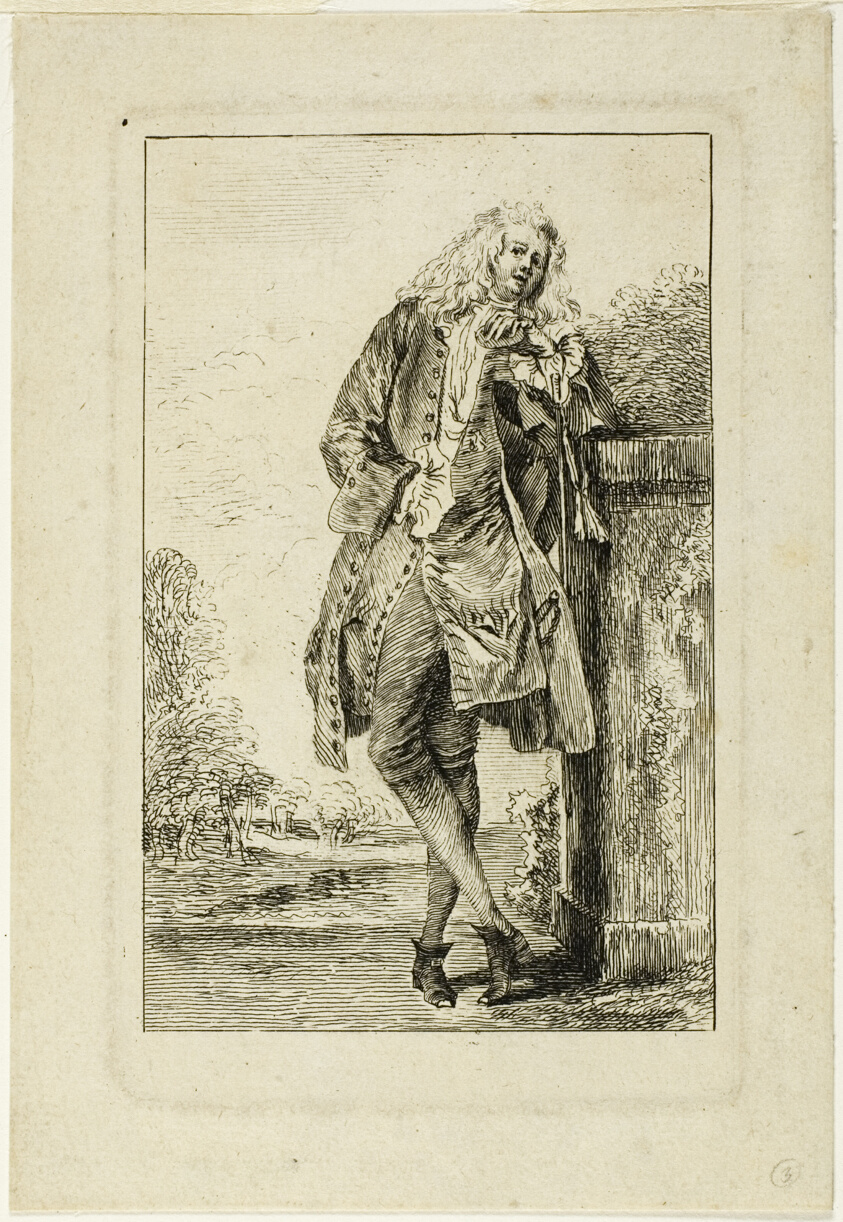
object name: Print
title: Standing Man Leaning on His Elbow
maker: Jean Antoine Watteau (French, 1684-1721); finished by Henri-Simon Thomassin (French, 1687-1741)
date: before 1710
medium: Etching on cream laid paper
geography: France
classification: etching; print; prints and drawing